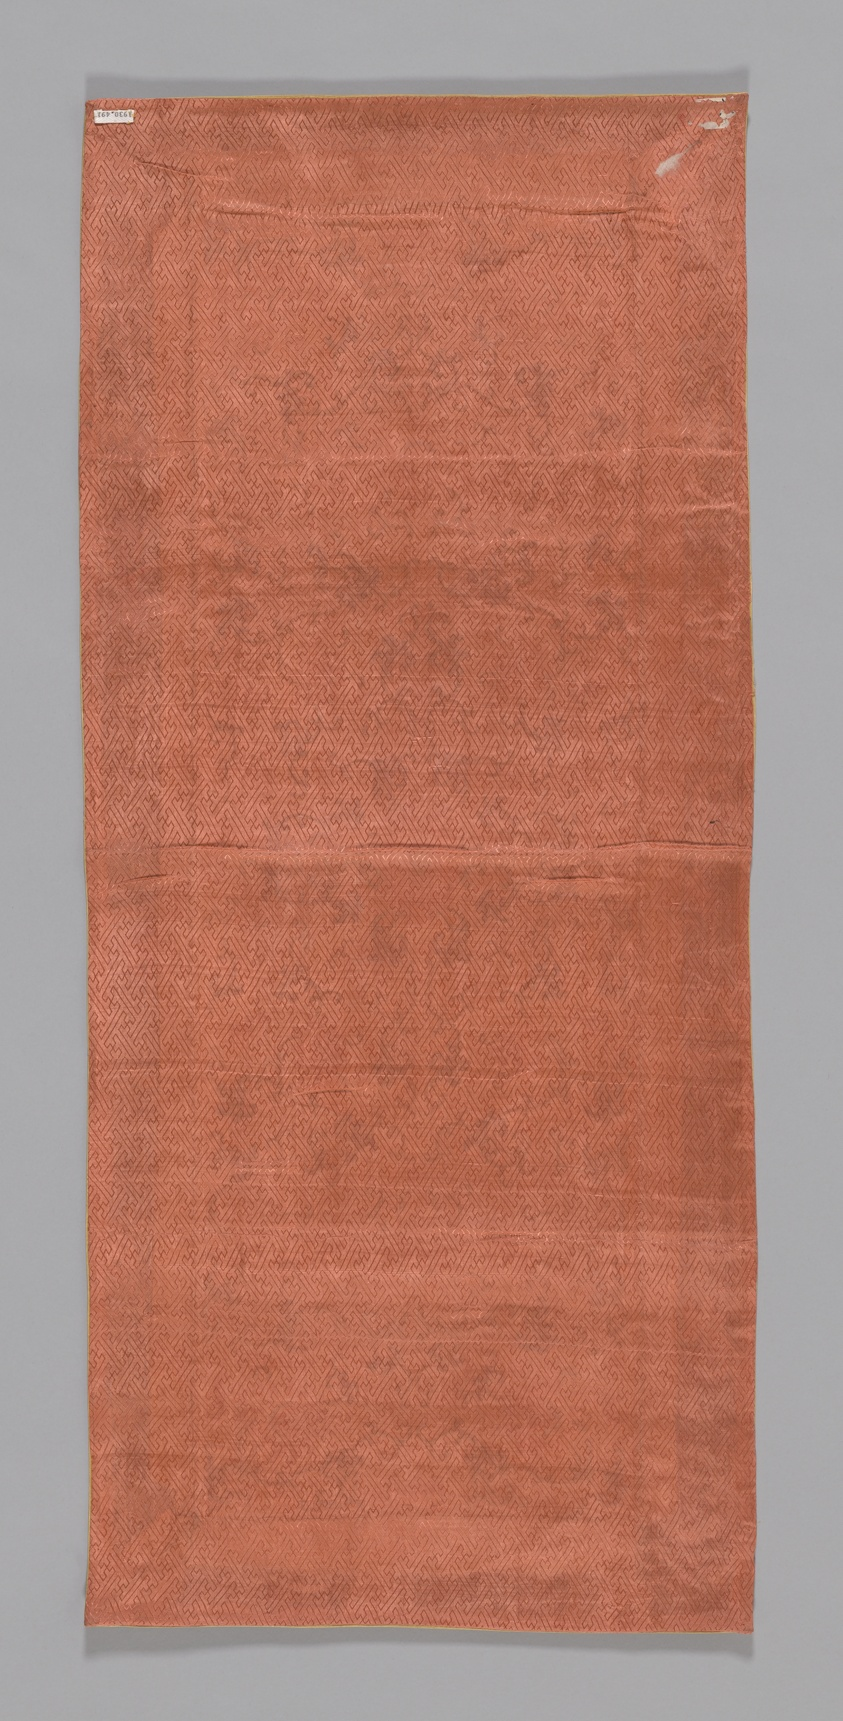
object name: Textile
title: Panel (Furnishing Fabric)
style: ming, Chinese (culture or style), East Asian, asian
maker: China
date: Qing dynasty (1644–1911), 1800/50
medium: Rectangular embroidered tablecover. Satin stitch and stem stitch and very slight couching on satin ground. Colors of salmon, green, blue, yellow, maroon, gold, with narrow yellow edge. Rectangular embroidered tablecover. Satin stitch and stem stitch and very slight couching on satin ground. Center panel: quadrisymmetrical design of lotus-peony scroll with I magnolia branch and flying bats. Flowers and bats in graded shades of salmon pink. Foliage in shades of green and blue. Yellow ground. Border: on maroon colored satin cut on the bias; fancy gold fish, water weeds, rocks and occasional flowers and butterflies in shades of yellow, salmon, green and blue. Scales on goldfish couched with gold. Narrow yellow edge on outside and black edgs on inside of border. Pale salmon lining, fancy simple cloth, suastika design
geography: China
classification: textile; weaving; needlework (visual works); furnishing textile